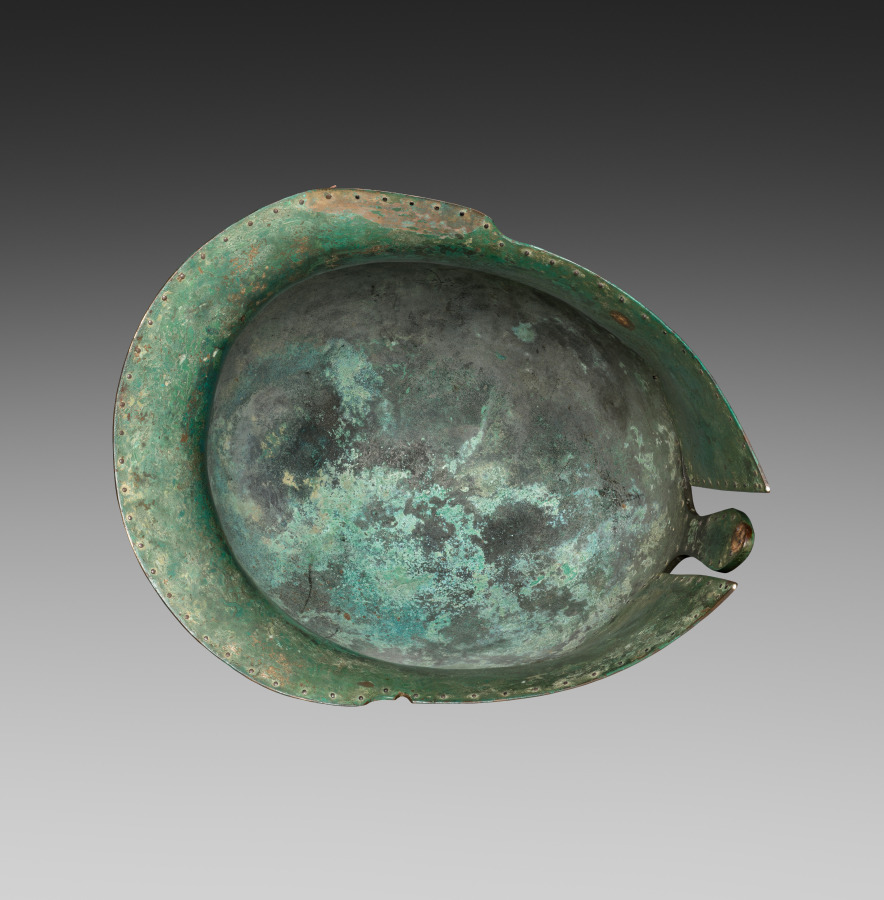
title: Corinthian Helmet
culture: Greece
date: 500–475 BCE or modern (before 1926)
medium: bronze with silver inlay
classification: Arms and Armor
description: Probably cast and then hammered into shape, this bronze helmet belongs to a type known as Corinthian, with almond-shaped eye holes, large cheekpieces, and a wide nose guard. Its significant weight raised early suspicions about authenticity, and although a 1928 technical examination found no conclusive evidence of forgery, scholars have continued to doubt its antiquity. Unusual details include the intact rivets, or metal fasteners, meant to secure liners; usually only their holes survive. The dueling warriors and inlaid palmette above the brow also find few parallels, and the silver meander pattern is unique. Most recently, a 2024 analysis found that both the copper and silver alloys of the helmet differ significantly from those expected in an ancient Greek helmet.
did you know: This helmet is very heavy—2.56 kilograms (5 lbs., 10 oz.), compared to average ancient helmets of 1.2–1.6 kilograms (about 3 lbs.).